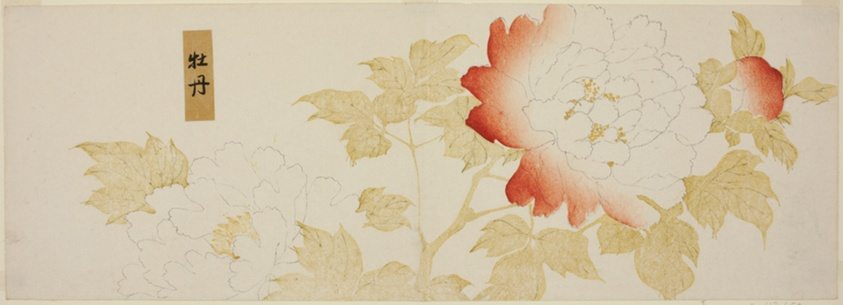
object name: Print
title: Peonies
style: Japanese (culture or style)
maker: Kitagawa Utamaro 喜多川 歌麿; Japanese, 1753 (?)-1806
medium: Color woodblock print; surimono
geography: Japan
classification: woodblock print; print; asian art